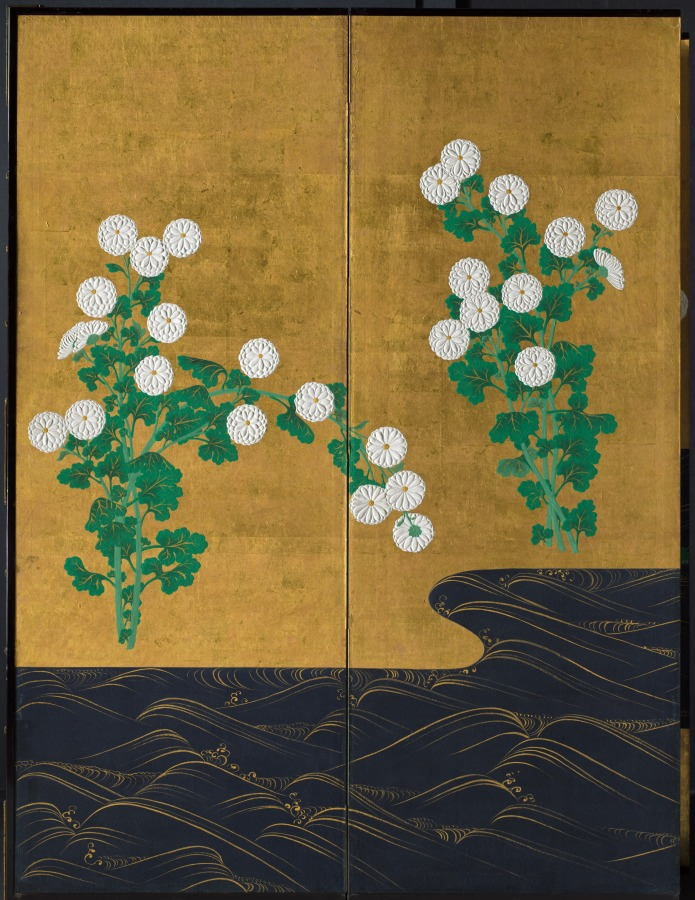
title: Chrysanthemums by a Stream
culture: Japan, Edo period (1615–1868)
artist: possibly by Ogata Kōrin (Japanese, 1658–1716)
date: c. 1715–30 or later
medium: One of a pair of six-panel folding screens; ink and color on gilded paper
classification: Painting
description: These screens recall a painting style so closely identified with Ogata Kōrin (1658–1716) that it is called Rinpa, or “Rin School,” after the ideograph “rin” in his name. The highly stylized background accentuates floral groupings that have been groomed so as to appear utterly artificial, like the synthetic arrangements available today. Kōrin's genius derived in large measure from natural phenomena painstakingly observed and then manipulated to create compositions of startling refinement and sparkling isolation. This process may have grown out of Kōrin's early immersion in the family textile business, a medium that encourages such dramatic distillations of form: the stream's gold-crested waves bring to mind traditional kimono robe designs of Kōrin's era. Works with the signature seen on this painting, including a style name, or persona suggested to Kōrin by his brother Kenzan (1663–1743), are sometimes considered to have been produced either in the last year of his life, when he was very ill, or after his death. In both scenarios, the lion’s share of the work would have been done by studio assistants, but little is truly known of his studio practice. Given the regularity of the gold waves on the stream, and the tension in the arrangement of the chrysanthemums, it is also possible that the screens were made in emulation of Kōrin's designs by a later artist.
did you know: The signature used on these screens may indicate paintings made in the last year of the artist's life, or works completed by his studio after his death.